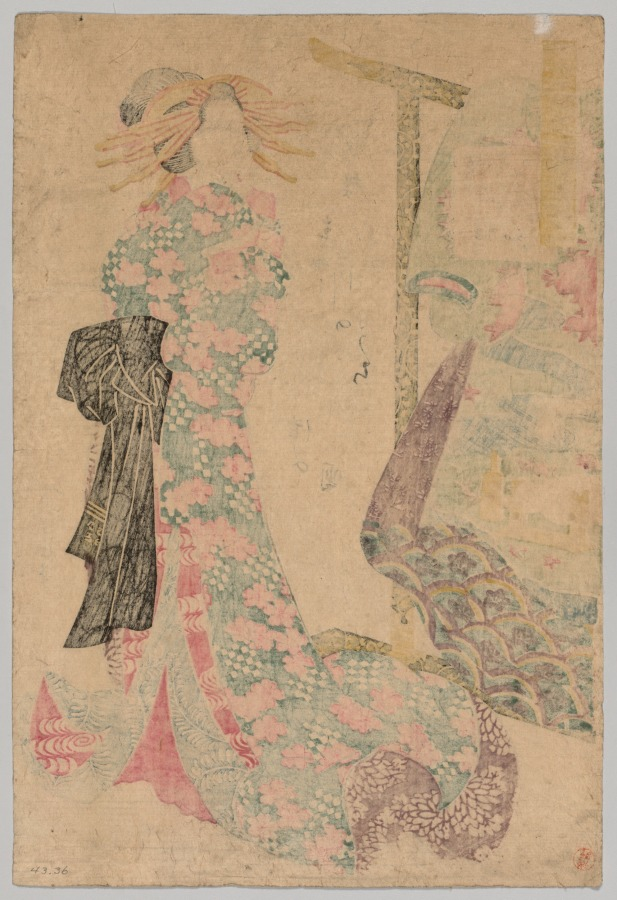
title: Courtesan Beside Kimono Rack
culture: Japan, Edo period (1615–1868)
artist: Kikukawa Eizan (Japanese, 1787–1867)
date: 1787–1867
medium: color woodblock print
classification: Print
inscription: Signature: Kikugawa Yeizan fude